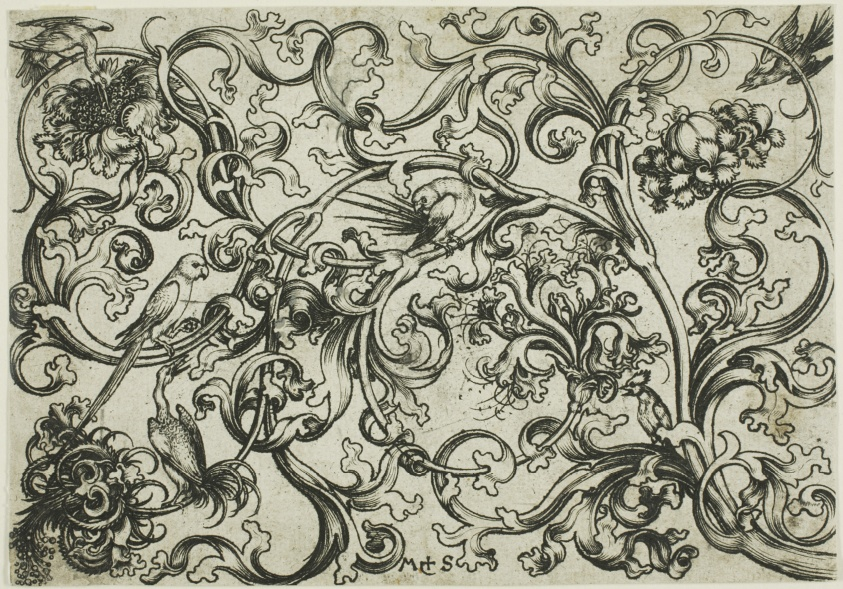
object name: Print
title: Vine Ornament with Parrots and Birds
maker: Martin Schongauer (German, c. 1430/50-1491)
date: before 1474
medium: Engraving on ivory laid paper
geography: Germany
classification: etching; print; prints and drawing